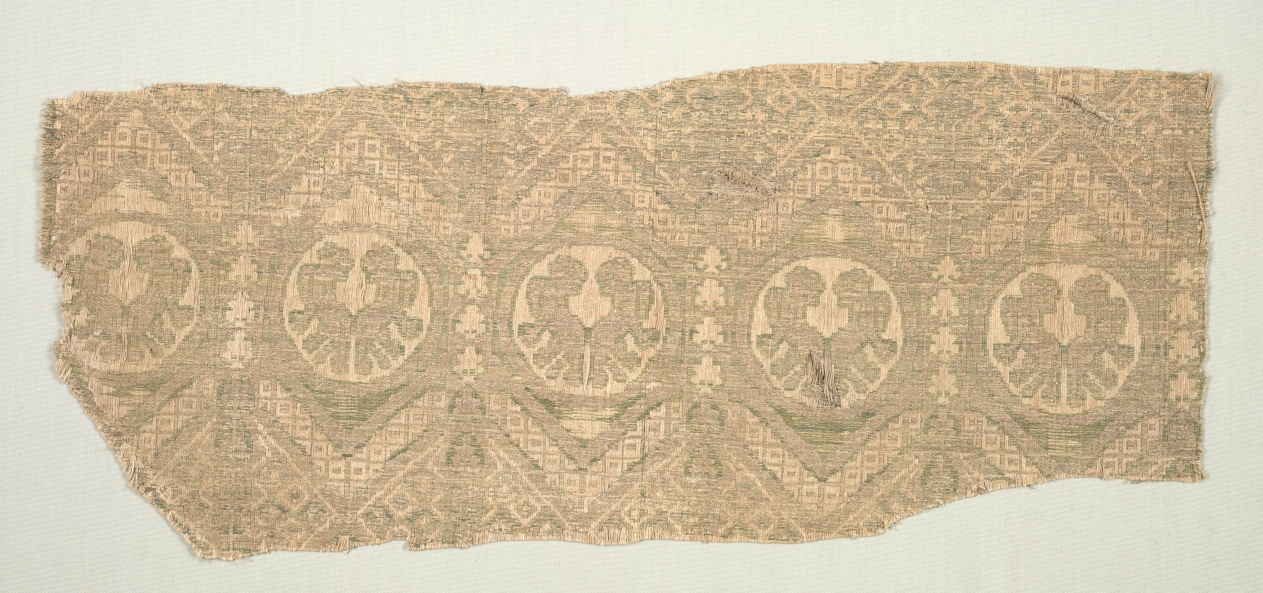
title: Textile Fragment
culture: Spain, Mudejar, 13th century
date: 13th century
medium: compound twill: silk, gold and linen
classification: Textile